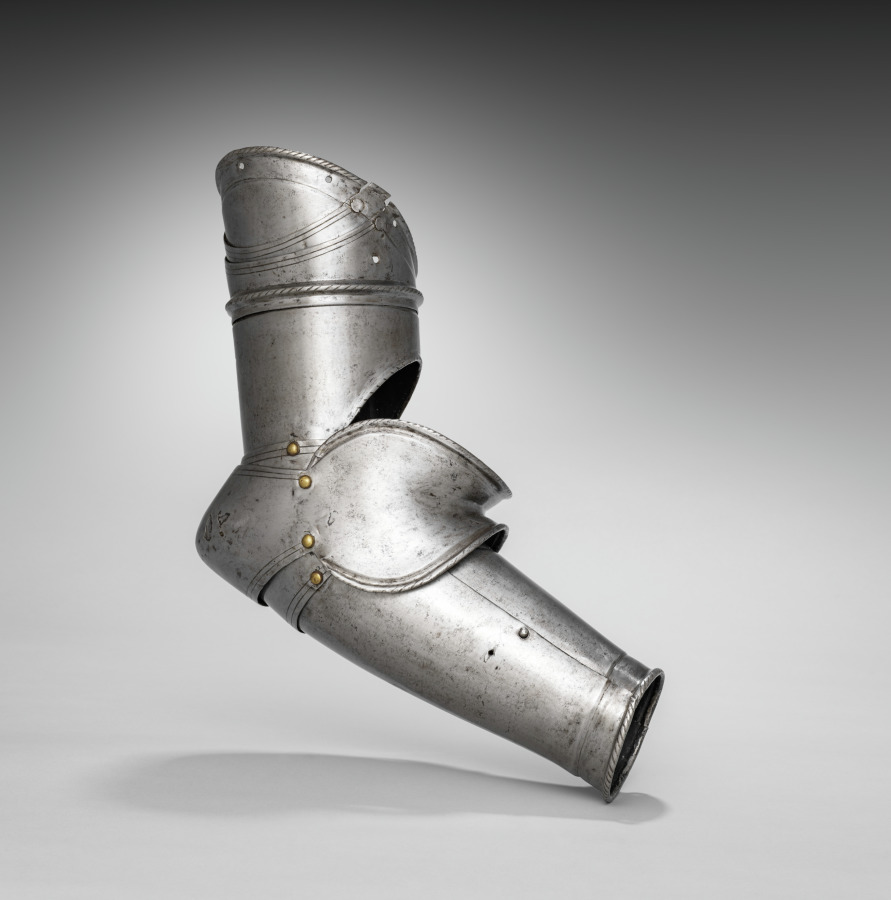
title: Proper Right Arm (Vambrace, Rerebrace and Couter)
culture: South Germany, 16th century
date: c. 1560–80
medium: steel, leather straps, brass rivets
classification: Arms and Armor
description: This armor was developed for the joust--a sporting combat between two mounted contestants. Although all of the elements of this armor date from the same period, they are not all from the same suit. This armor is thus called "composed." It also shows the asymmetry of jousting armor. The participants rode along a wall-like barrier known as a "tilt" with their left sides facing one another. Consequently, armor on that side of the body had to be thicker. Note the large plate (grandguard) over the left shoulder for extra protection. Also, the breathing holes in the helmet were placed on the right side (farthest from an opponent's lance) to avoid injuries from splinters. The bracket attached to the right breastplate is called the lance-rest, a shock-absorbing support designed to accommodate the lance when "couched" under the right armpit.